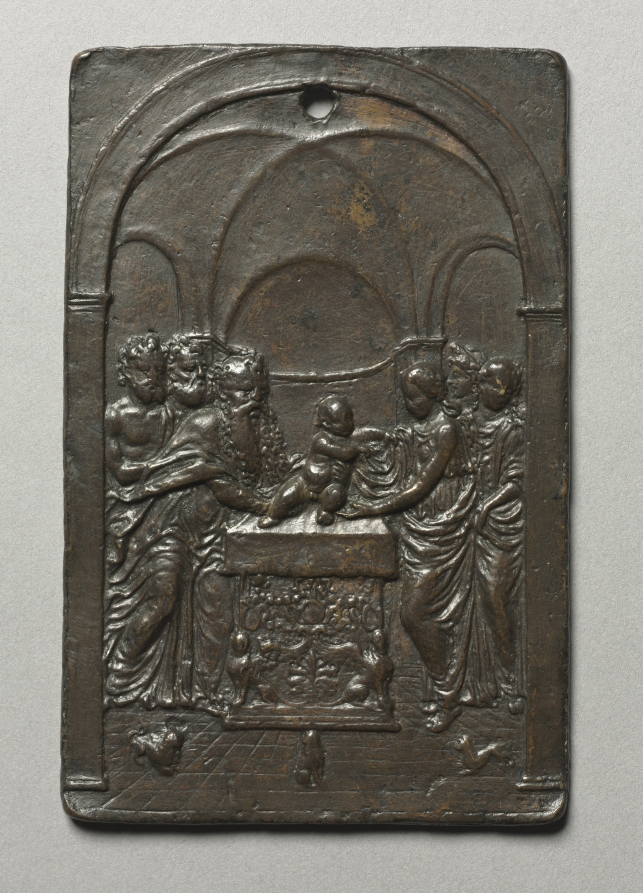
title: Presentation in the Temple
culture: Italy, 16th century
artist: Moderno (Italian, 1467–1528)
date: c. 1505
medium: bronze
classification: Sculpture